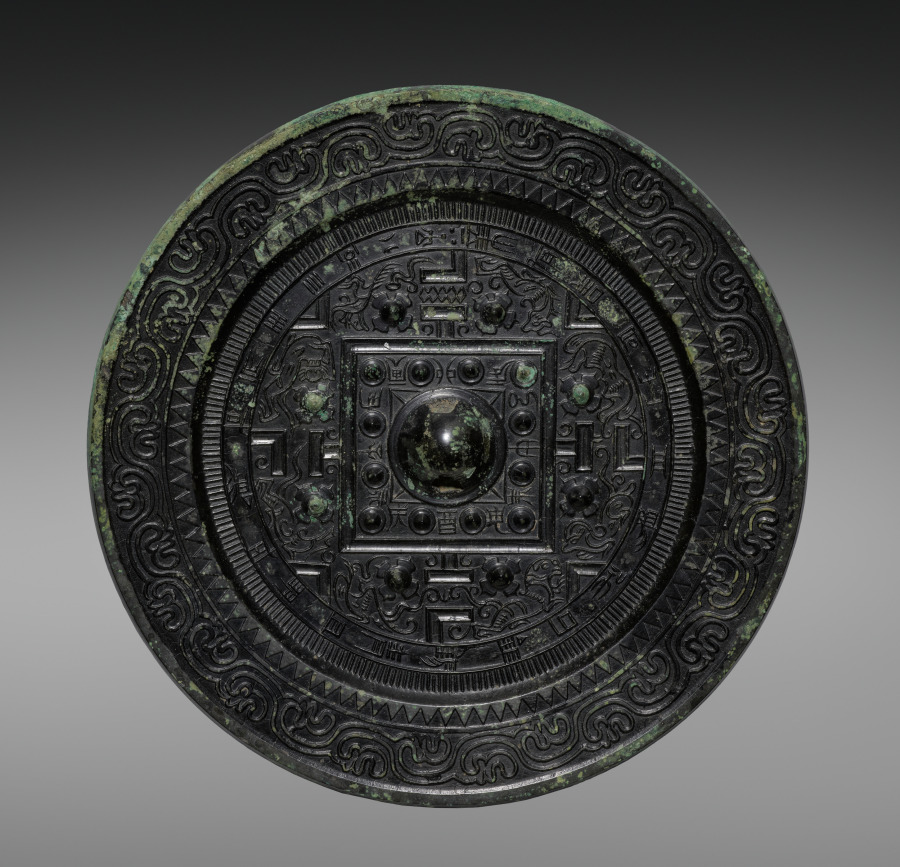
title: TLV Mirror with Multiple Nipples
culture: China, Xin dynasty (9–23 CE)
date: 9–23 CE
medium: bronze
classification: Metalwork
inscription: 新有善銅出丹陽， 和以銀錫青且明。 左龍右虎主四澎（旁） 八子。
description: TLV mirrors of the Han dynasty were named after the motifs resembling the letters T, L, and V. Their meaning relates to cosmology. A concentric band of characters around the central knob reads, Good copper of the current Xin dynasty was mined at Danyang. / Mixed with white tin, the alloy is clear and bright. . . . Danyang county in Jiangsu province was rich in metal resources. Mirrors mentioning Danyang were found in Zhejiang, Hubei, Henan, Hunan, and Shanxi provinces, which suggests their export beyond Jiangsu. Alternatively, competing mirror makers elsewhere could have used Danyang as an early type of branding.